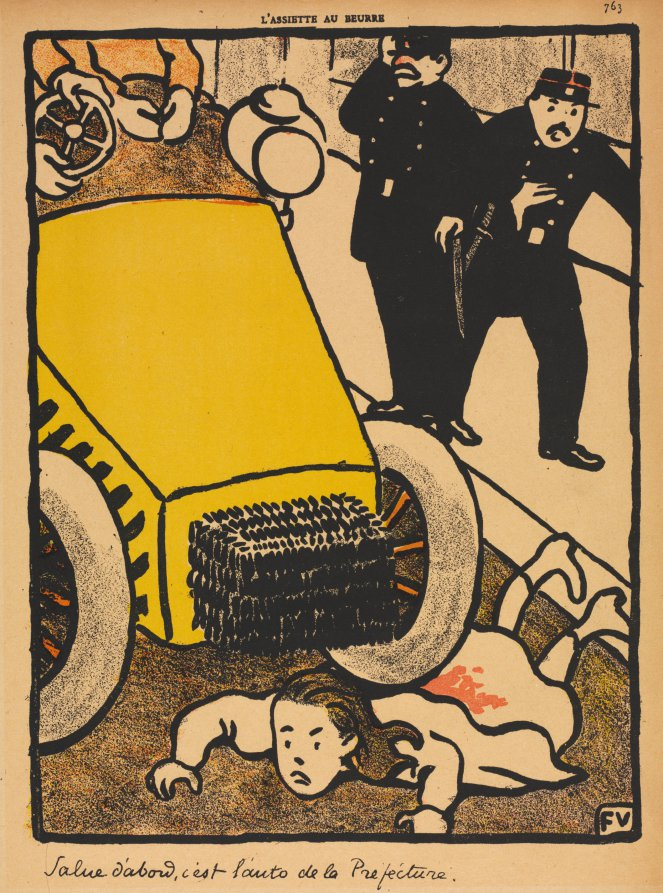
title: Salute first...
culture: France, 19th century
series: Crimes and Punishments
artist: Félix Vallotton (Swiss French, 1865–1925)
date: 1901, published 1902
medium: color lithograph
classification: Print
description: This print was published in the magazine L’Assiette au Beurre (March 1, 1902 ) as plate 6 from the series Crimes and Punishments.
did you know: Félix Vallotton's caricatural depictions of Parisian police officers may relate to his interest in anarchist politics during the 1890s.